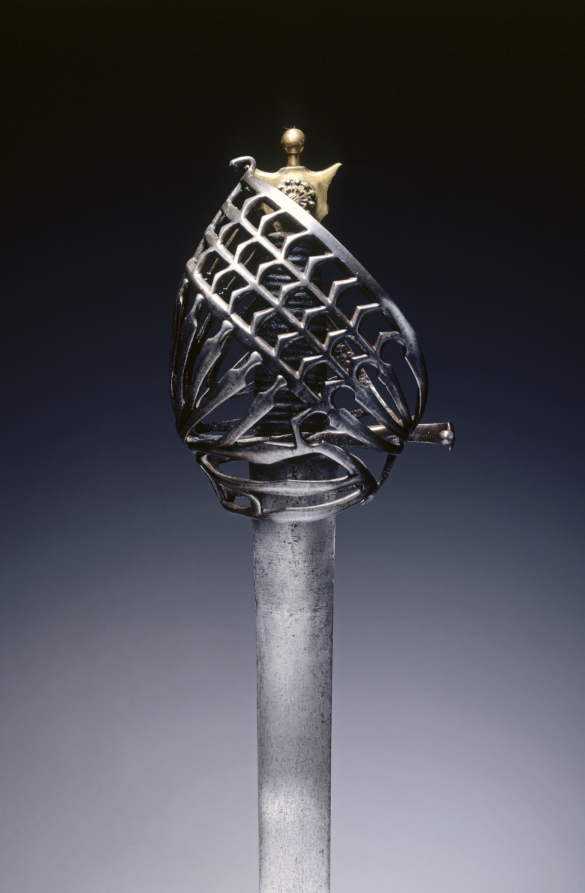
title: Schiavona Broadsword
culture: Italy, Venice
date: early 1700s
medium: steel, leather, wood, brass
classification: Arms and Armor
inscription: blade inscribed: POTZDAM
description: The schiavona-type broadsword features a complex barred guard that slopes forward. Its name derives from the Italian word for "Slavonic" and refers to the Slavonian corps who served as bodyguards to the Doge of Venice until the end of the Venetian Republic in 1797. Such swords were popular mainly with Venetians.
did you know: Usually used by the military, a broadsword has a straight, wide, two-edged blade a with basket-shaped guard that helps protect the hand.